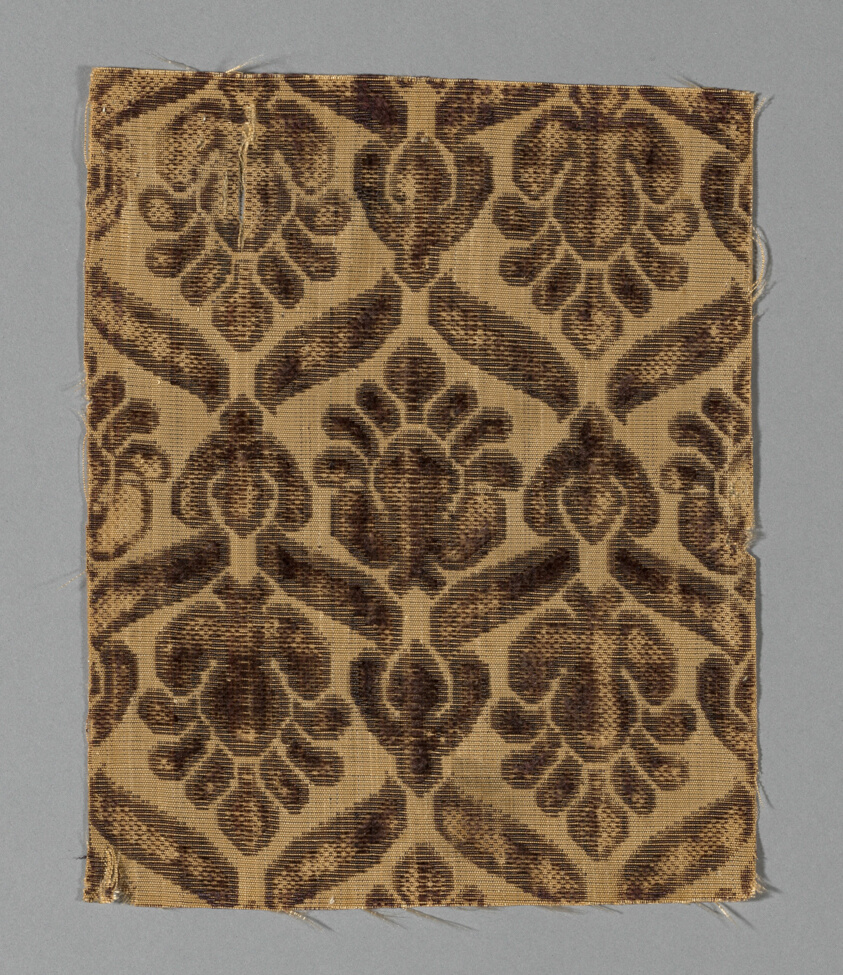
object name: Textile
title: Fragment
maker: Italy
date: 1675/1700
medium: Silk, plain weave with supplementary pile warps forming cut, uncut, and voided velvet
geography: Italy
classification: textile; weaving - velvet; weaving